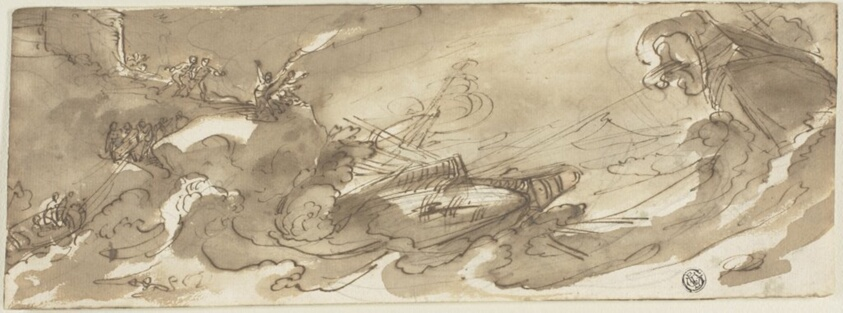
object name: Drawing and Watercolor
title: Shipwreck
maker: Napoletano Filippo; (Italian, c. 1587-1629)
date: 1622-23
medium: Pen and brown ink and brush and brown wash, over black chalk, on ivory laid paper, laid down on ivory wove paper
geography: Italy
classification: pen and ink drawings; drawings (visual works); prints and drawing